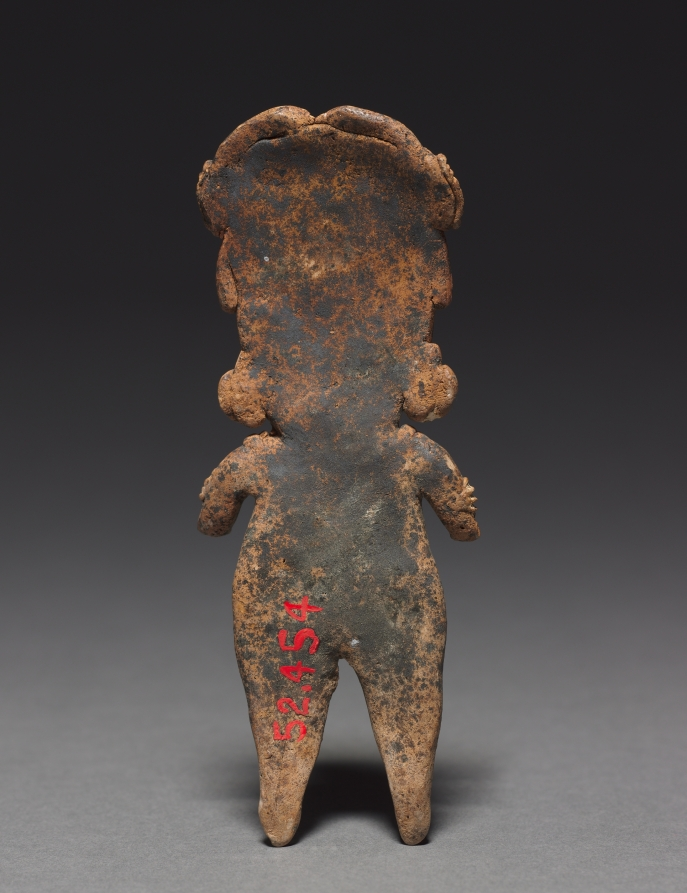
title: Archaic Figurine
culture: Mesoamerica, Mexico, Guanajuato, Chupícuaro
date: 400–100 BCE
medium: earthenware with pigments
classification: Ceramic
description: Burials from ancient villages near Chupicuaro, Guanajuato contain hundreds of pottery offerings. These include brightly colored vessels and solid figurines decorated with appliqué and incision. The cheerful, informal figurines were probably intended to provide the dead with companionship, and to remind them of their loved ones.